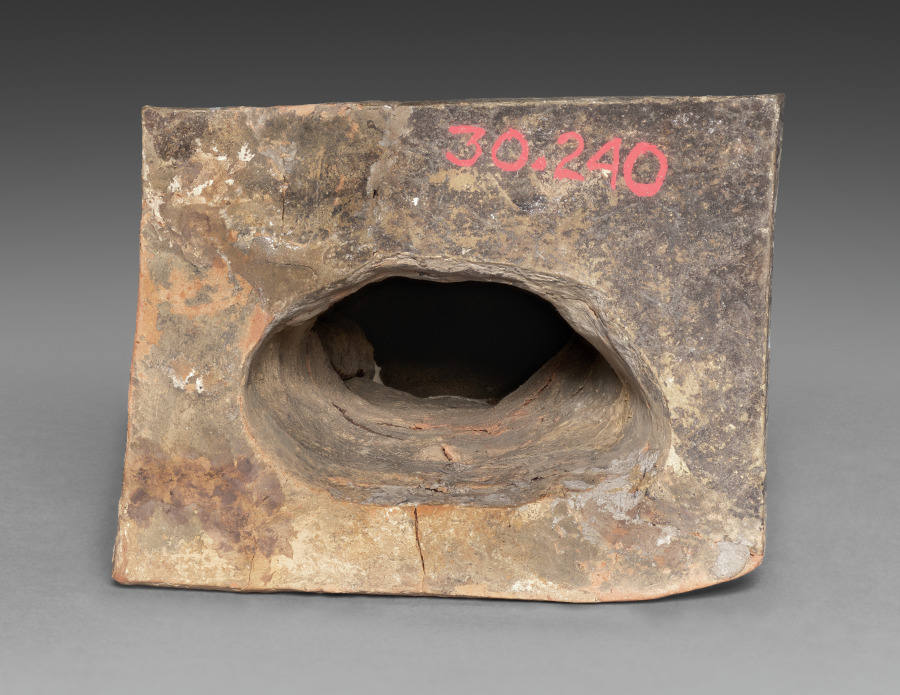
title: Figurine of a Lady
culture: Greece, Tanagra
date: 200s BCE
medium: terracotta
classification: Sculpture